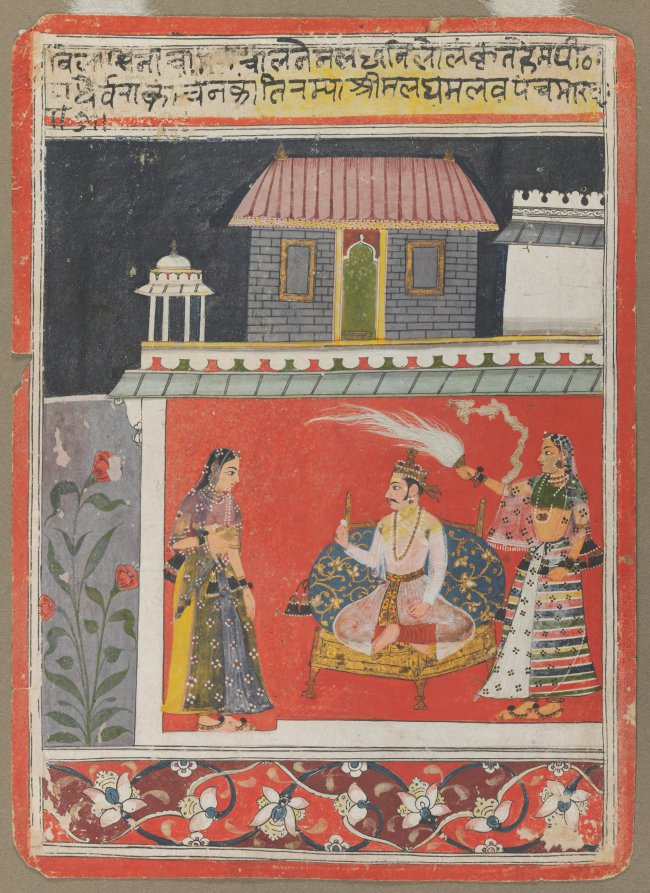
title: Pancham Raga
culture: Central India, Malwa, 17th century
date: c. 1660–80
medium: Gum tempera, ink, and gold on paper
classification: Painting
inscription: Inscription: "Pancham Raga-A lord with intense looks and a disturbed mind who has the chauri moving (behind him) gazes at the pleasure-seekirig woman."